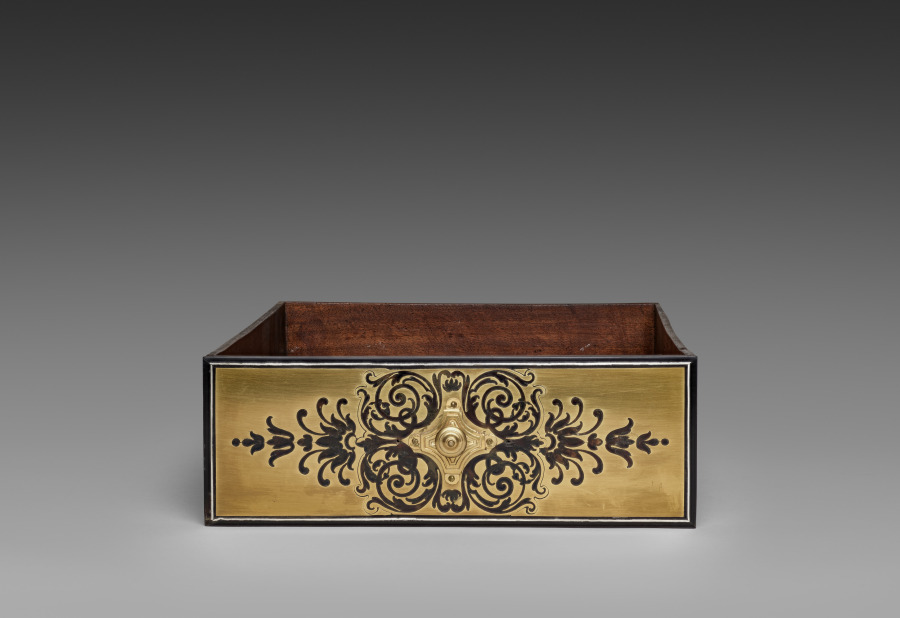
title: Interior Drawer for Cabinet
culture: France, late 17th Century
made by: André-Charles Boulle (French, 1642–1732)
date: c. 1690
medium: ebony, marquetry in metal and tortoise shell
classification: Furniture and woodwork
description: Appointed cabinetmaker to King Louis XIV in 1672, André-Charles Boulle became a master of furniture making in France during the late 1600s until his death in 1732. Known primarily for his use of marquetry, in which metal patterns are inlaid into tortoiseshell then applied within the veneered surface of the furniture, Boulle established a level of quality and craftsmanship few others could achieve. As a result, his work found favor at the royal court and among other aristocrats and diplomats eager to impress the king. The inclusion of a medallion depicting Louis XIV within the bronze decoration of this chest would have identified the owner with the royal court. Often exhibiting stout architectural proportions with elegant groups of inlaid motifs such as the parrot on the central panel of this chest, Boulle’s designs are an example of the intellectual fashion for contrasting ideas, materials, and motifs.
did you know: Originally designed to sit atop an elaborate tall stand, this chest was likely altered in the late 1700s to reduce its scale and height.